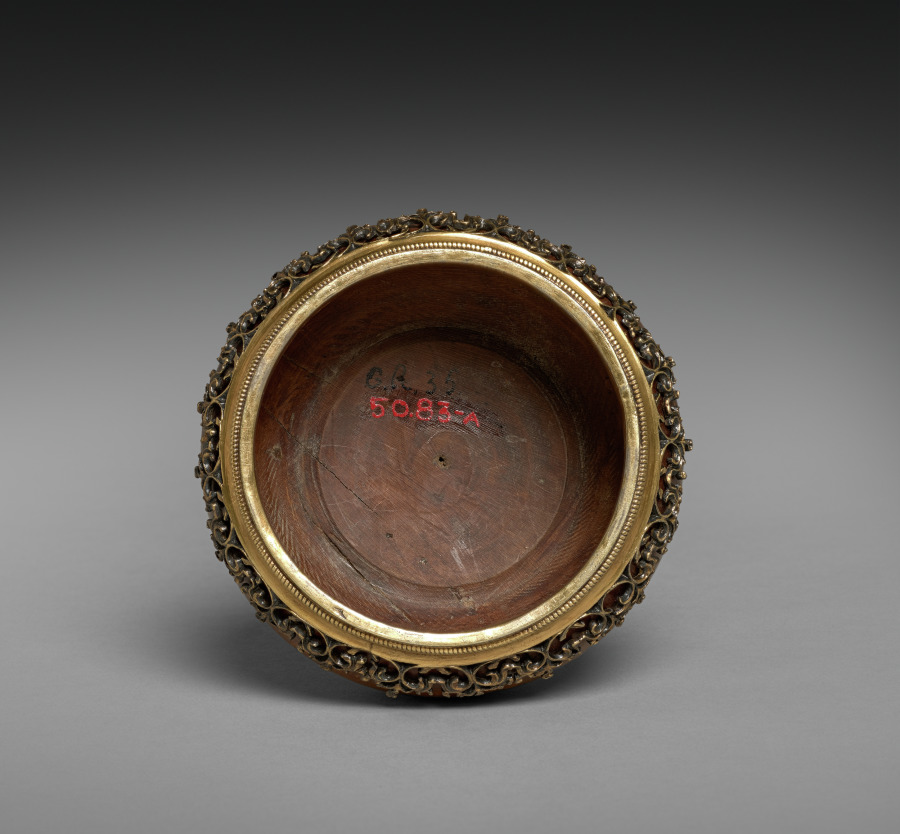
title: Double Cup (Mazer) (lid)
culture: Germany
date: c. 1530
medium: maple wood with gilt-silver mounts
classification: Wood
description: A characteristic form of drinking vessel made of close-grained wood, especially maple, was developed in Germany as early as the thirteenth century. It consisted of a larger cup with a foot and a handle and a smaller cup on top. The upper one served as a lid but could also be removed and used as a separate drinking vessel. In this example the smaller upper cup is inset with a memorial portrait medallion of Albrecht Dürer made in the year of his death, 1528. The medal is the work of Matthes Gebel who was active in Nuremberg and Augsburg as a medallist from 1523 to his death in 1574. The reverse of the medal is set into the base of the larger lower cup.